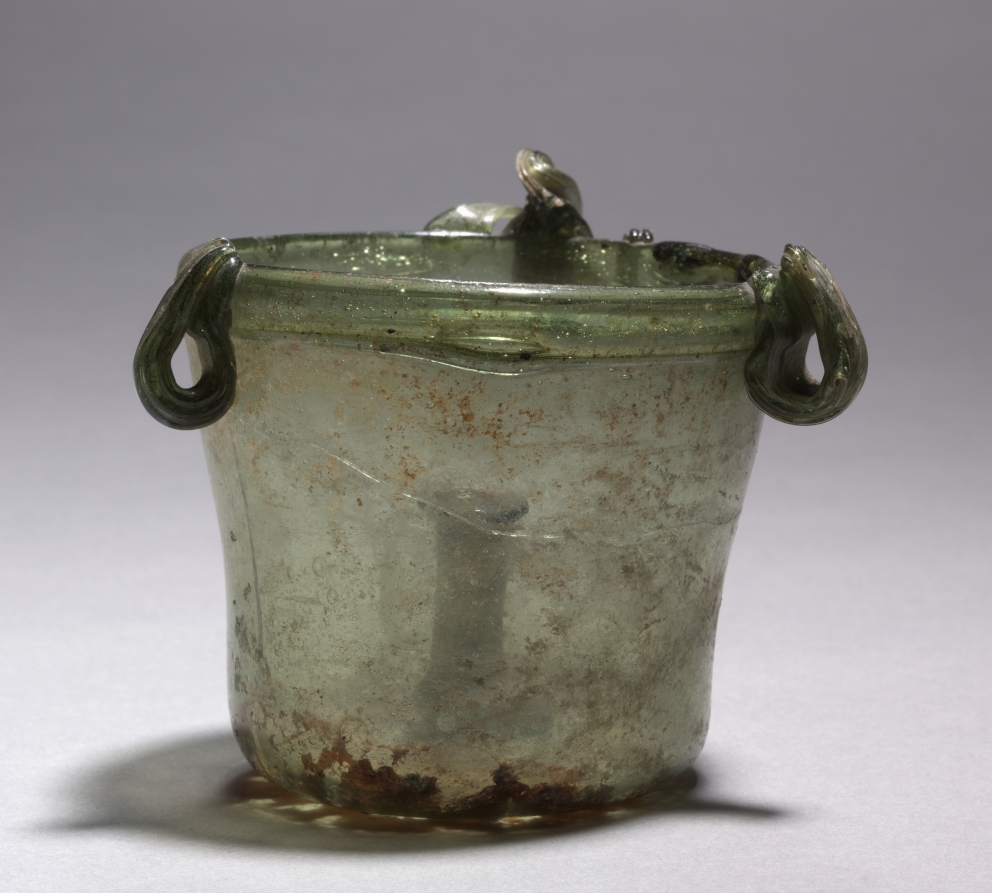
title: Lamp with Wickholder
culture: Eastern Mediterranean, Roman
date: 300–600 CE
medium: glass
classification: Glass